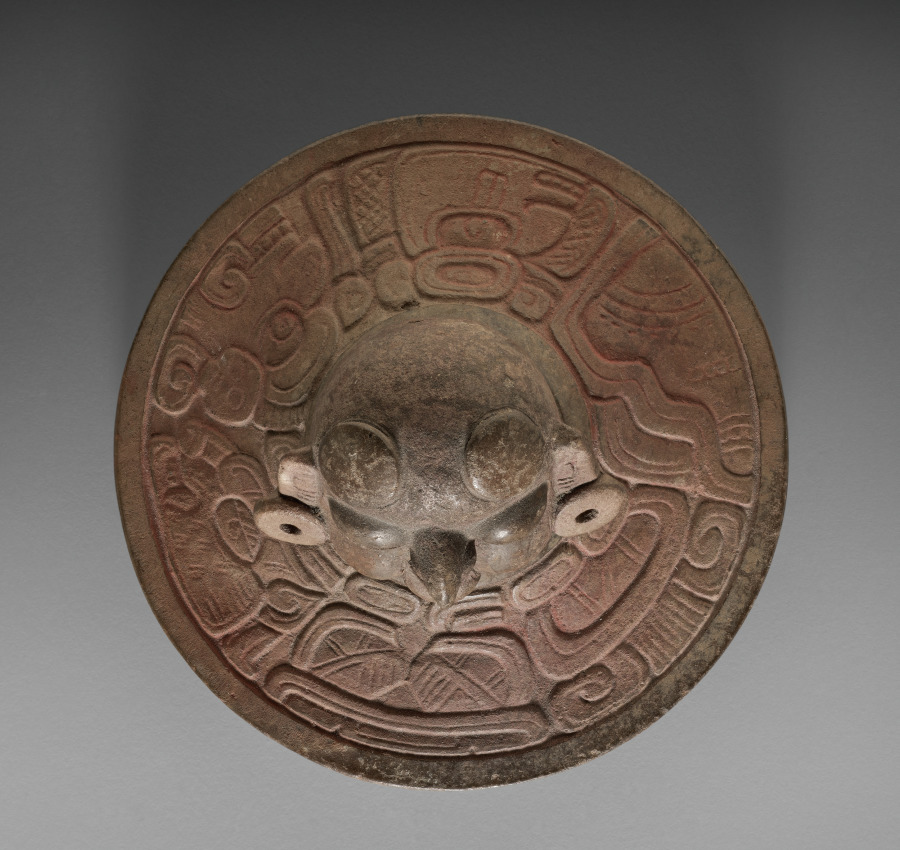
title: Tripod Vessel with Lid (lid)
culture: Mexico or Central America, Maya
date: 250–600 CE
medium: earthenware with pigment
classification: Ceramic